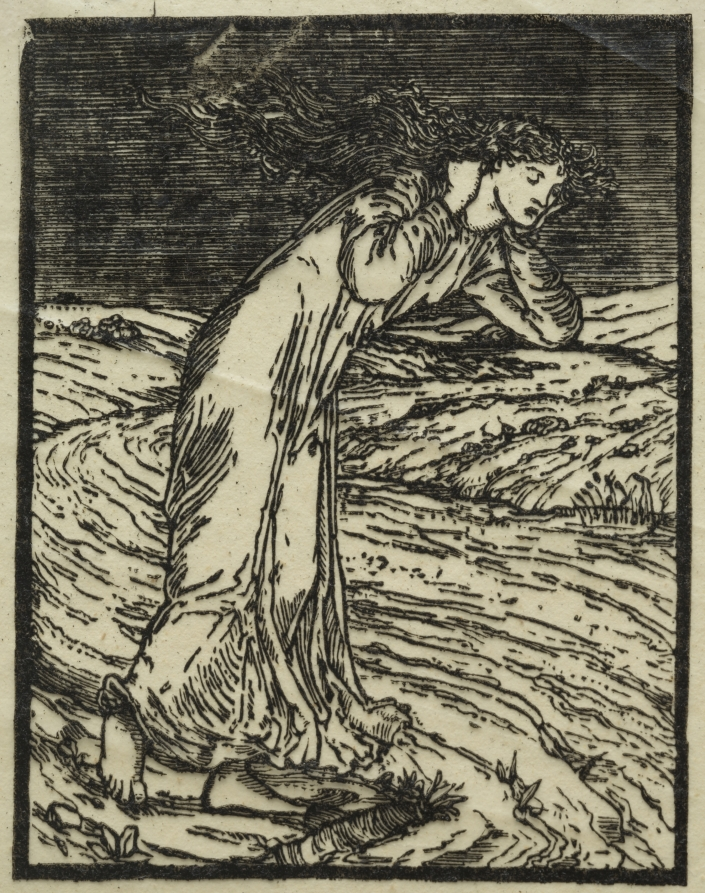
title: Psyche Throwing Herself into the River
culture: England, 19th century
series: The Legend of Cupid and Psyche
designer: William Morris (British, 1834–1896)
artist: Edward Burne-Jones (British, 1833–1898)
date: 1865–68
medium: wood engraving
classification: Print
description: Psyche, a mortal, has been abandoned by her lover, the god Cupid, in this print. The young woman steps sobbing into a river as her hair flows behind her. This image is one of the few illustrations ultimately realized from an early collaboration between designer William Morris and artist Edward Burne-Jones. Centered on Morris’s retelling of ancient myths and legends, the project was abandoned after they had engraved the illustrations for one of the 24 stories because the pair was unable to find a suitable publisher. The experience ultimately led Morris to establish his own firm, the Kelmscott Press.